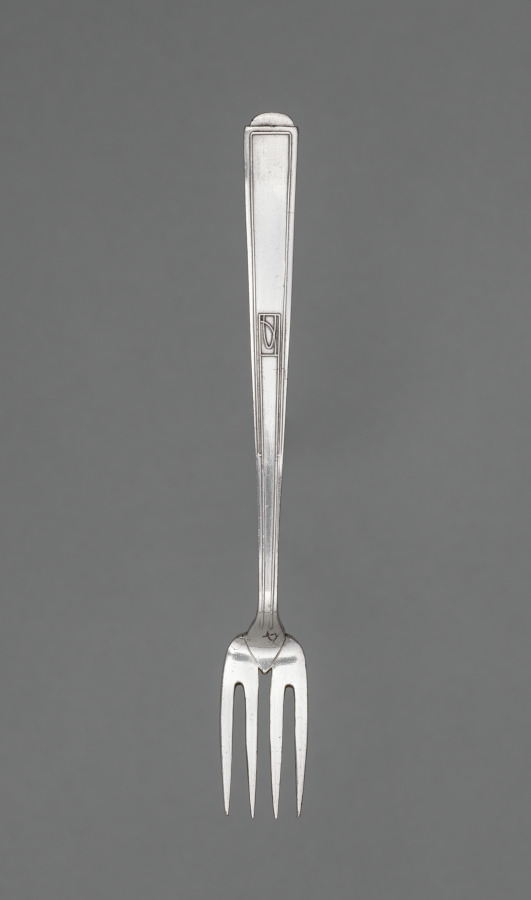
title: Fish Fork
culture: Germany, late 19th-early 20th Century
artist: Josef Maria Olbrich (German, 1867–1908)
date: c. 1900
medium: silver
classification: Silver